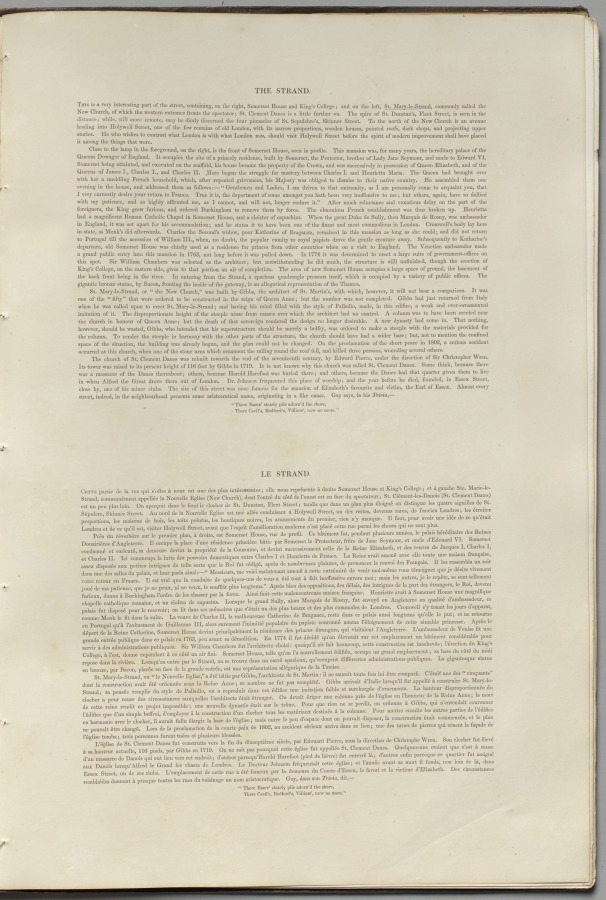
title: London As It Is: The Strand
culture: England, 19th century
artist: Thomas Shotter Boys (British, 1803–1874)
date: 1842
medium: lithograph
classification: Bound Volume